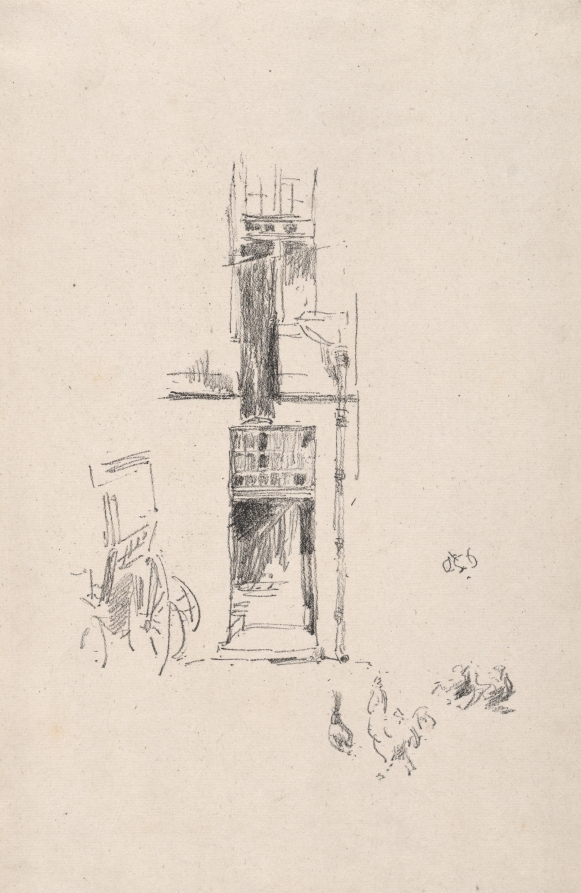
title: Cocks and Hens, Hotel Colbert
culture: America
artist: James McNeill Whistler (American, 1834–1903)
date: 1891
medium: lithograph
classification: Print